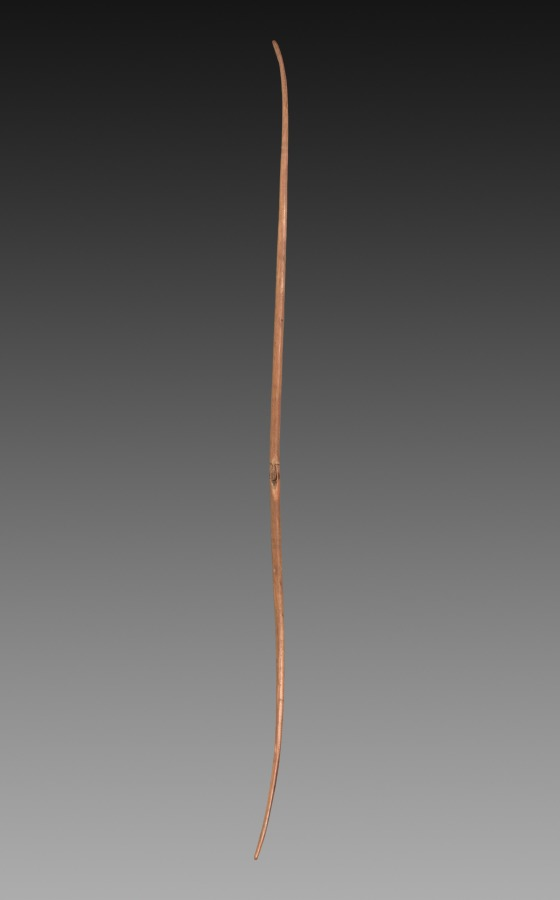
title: Wooden Bow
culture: Egypt, First Intermediate period (2123–2040 BCE), Dynasty 10–Middle Kingdom (2040–1648 BCE), Dynasty 12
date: 2123–1914 BCE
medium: wood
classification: Wood